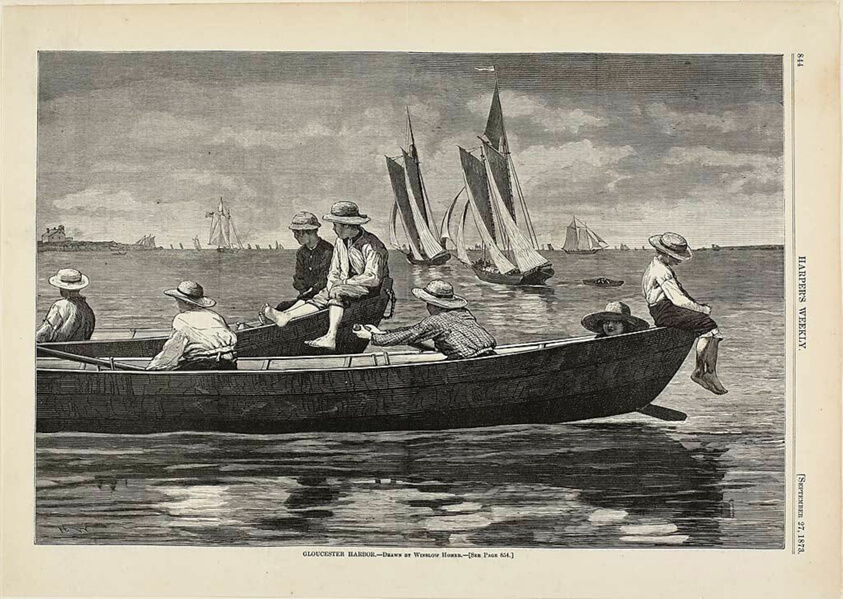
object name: Print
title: Gloucester Harbor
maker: Winslow Homer (American, 1836-1910); published by Harper's Weekly (American, 1857-1916)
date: published September 27, 1873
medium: Wood engraving on buff wove paper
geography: United States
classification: wood engraving; print; prints and drawing